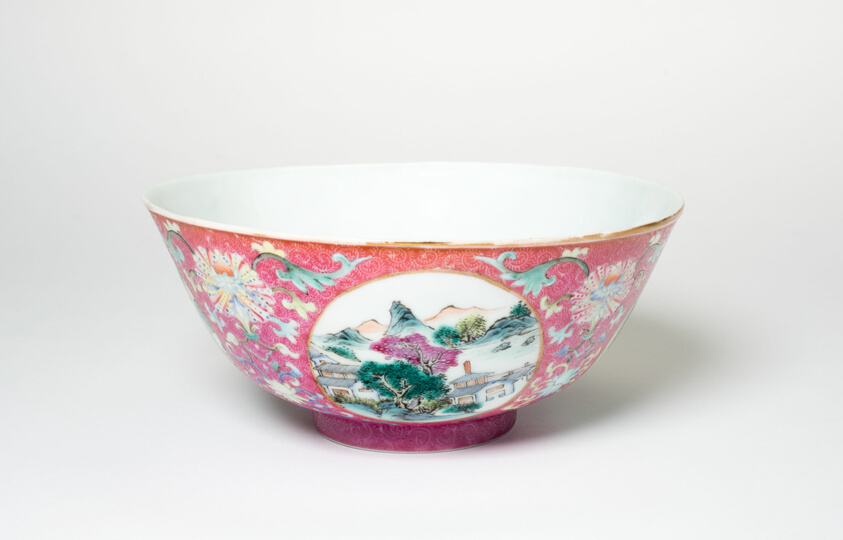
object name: Vessel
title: Bowl with Landscapes, Medallions, and Stylized Flowers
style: Chinese (culture or style)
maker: China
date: Qing dynasty (1644–1911), Qianlong reign mark and period (1736–1795)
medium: Porcelain with overglaze enamel decoration and painted gold rim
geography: China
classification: bowl; porcelain; dish (vessel); asian art; ceramics; vessel